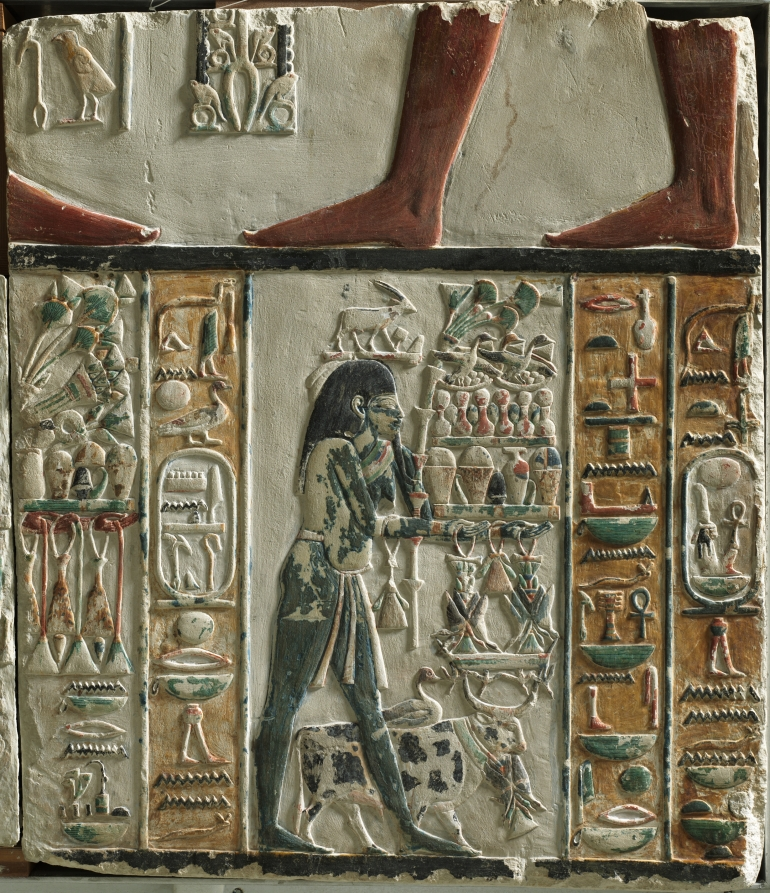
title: Nome Gods Bearing Offerings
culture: Egypt, New Kingdom (1540–1069 BCE), Dynasty 18, reign of Amenhotep III (1390–1352 BCE)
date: c. 1391–1353 BCE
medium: painted limestone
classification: Sculpture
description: These blocks from a temple wall have preserved their original painted decoration to a remarkable degree. The four portly figures in the lower register bear emblems on their heads identifying them as nomes, or provinces, of ancient Egypt. Carrying trays heaped with offerings and leading sacrificial animals, they personify the bounty of the land. First (on the right) is the Oryx Nome, followed by the Dog Nome, the Falcon Nome, and the Double Scepter Nome. The face of each nome figure is a miniature portrait of Amenhotep III, and each recites a speech in the king's name. The first figure says, "King Nebmaatra [Amenhotep III] has come, bringing to you every good thing that is in this land, that you may give him all life, stability, dominion, and all health from you." The second, third, and fourth figures bring "all greens," "the produce of the Two Lands [Upper and Lower Egypt]," and "all offerings and provisions." The god to whom the nomes bring offerings stood in the fragmentary upper register, facing a standing figure of the king, Amenhotep III. The pair of legs on the right belonged to the god; the single foot on the left belonged to the king. The god held a scepter, forked at the bottom, embellished with coils of rope (for eternity), tadpoles (for hundreds of thousands), and notched palm ribs (for years), the whole signifying "an eternity of hundreds of thousands of years." These blocks may be from Amenhotep III's temple at Kom el-Ahmar, ancient Hebenu, in Middle Egypt, dedicated to the god Horus. Hebenu was the capital of the Oryx Nome, which leads the procession of nome gods. Amenhotep III's temple was later dismantled, and its blocks were reused in the foundations of another structure, which would account for the excellent preservation of the paint.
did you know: Another block from the same temple wall was acquired 15 years earlier by the museum.